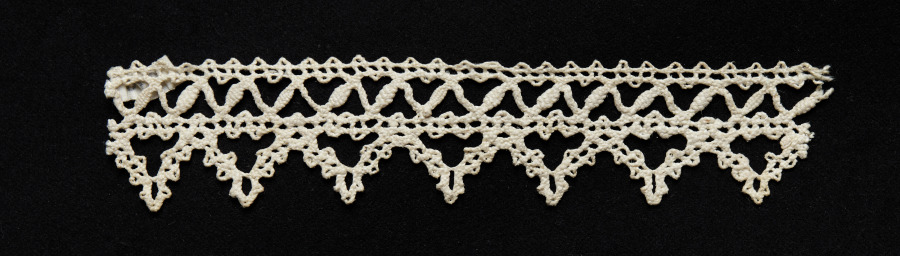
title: Lace Edging of Points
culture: Italy, Genoa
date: 1550–99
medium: Bobbin lace (needle lace, reticella design)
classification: Lace